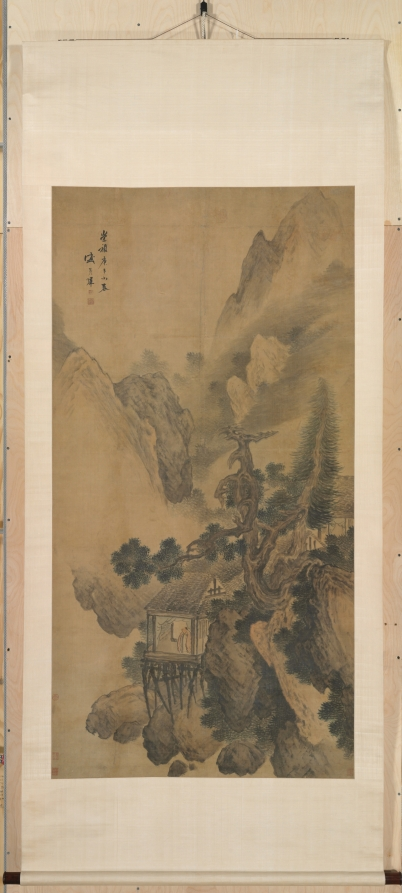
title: Lonely Retreat Overlooking a Misty Valley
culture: China, Ming dynasty (1368–1644)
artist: Sheng Maoye (Chinese, active early 1600s)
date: 1630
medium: hanging scroll; ink and slight color on silk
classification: Painting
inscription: Artist's inscription, signature, and 2 seals: In the tenth month of the gengwu year of the Chongzhen era [1630]. Sheng Maoye [seals] Sheng yin Maoye; Yuhua shi.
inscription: 4 additional seals of Liu Shu (1759–1816)